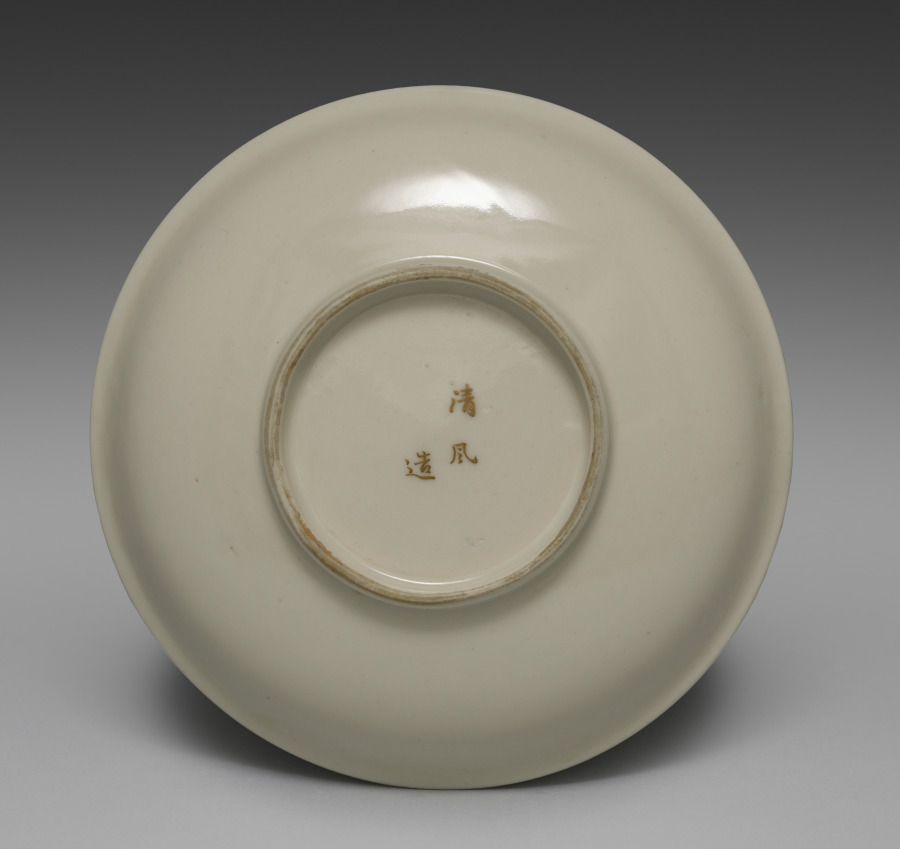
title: Medium-sized Dish from Dining Set with Plum Blossoms and Cracked-Ice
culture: Japan, Meiji period (1868–1912)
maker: Seifū Yohei II (Japanese, 1844–1878)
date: c. 1875–78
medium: Porcelain with molded designs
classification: Ceramic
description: Each item in this set has a delicate low-relief design of flowering plum branches over scattered, intersecting lines meant to resemble the cracked-ice surface of a frozen body of water and is signed on the base in gold pigment. While Yohei II produced many fine works in underglaze blue, like those produced by Kiyomizu Shichibei, he also made works in quite different styles later in his career, from the early 1870 s. In 1873, he was appointed purveyor to the Industrial Center of Kyoto Prefecture, a designation associated with Kyoto’s efforts to reach an international market through the port of Kobe; and from 1875 until his death, he was involved in national-level projects to present Japanese ceramics across the world. It was during this period that Yohei III was apprenticed to Yohei II, and it has been suggested that this set may in fact be an early example of Yohei III’s work, which he signed with his teacher’s name. Decorated with flowers resembling Japanese textile motifs, the set calls to mind the design of Yohei II’s pair of vases with plum blossoms in the Victoria and Albert Museum. Here, the elaborate trees created for a formal public exhibition setting have been translated into the approachable blossoms of the genteel domestic environment. While the designs are consistent across the pieces, each raised flower petal and pistil and each incised line in the ice was done by hand, so the cups, bowls, and dishes are similar yet unique. The bottoms of two boxes once identified the set’s owner, but the information has been deliberately obscured with black ink. However, inscriptions still visible appear to indicate two occasions, once at the end of July 1886 , and once again in June 1916 , when parts of the set were requested from Hokura in Niigata Prefecture. The location corresponds to a neighborhood in the present-day city of Jōetsu. The surname Tsuji 辻 also appears on a paper tag affixed to one of the box cloths. Future research may possibly reveal more about their provenance. A vase by Yohei III in a private collection combines the formal grandeur of the Yohei II vases in the Victoria and Albert Museum with the gentler design of this dining set, placing flowering plum trees against soft, scalloped-edge clouds resembling those in golden screens.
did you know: The dining wares have a creamy white coloration that the four boxes containing them identify as Korean in style.